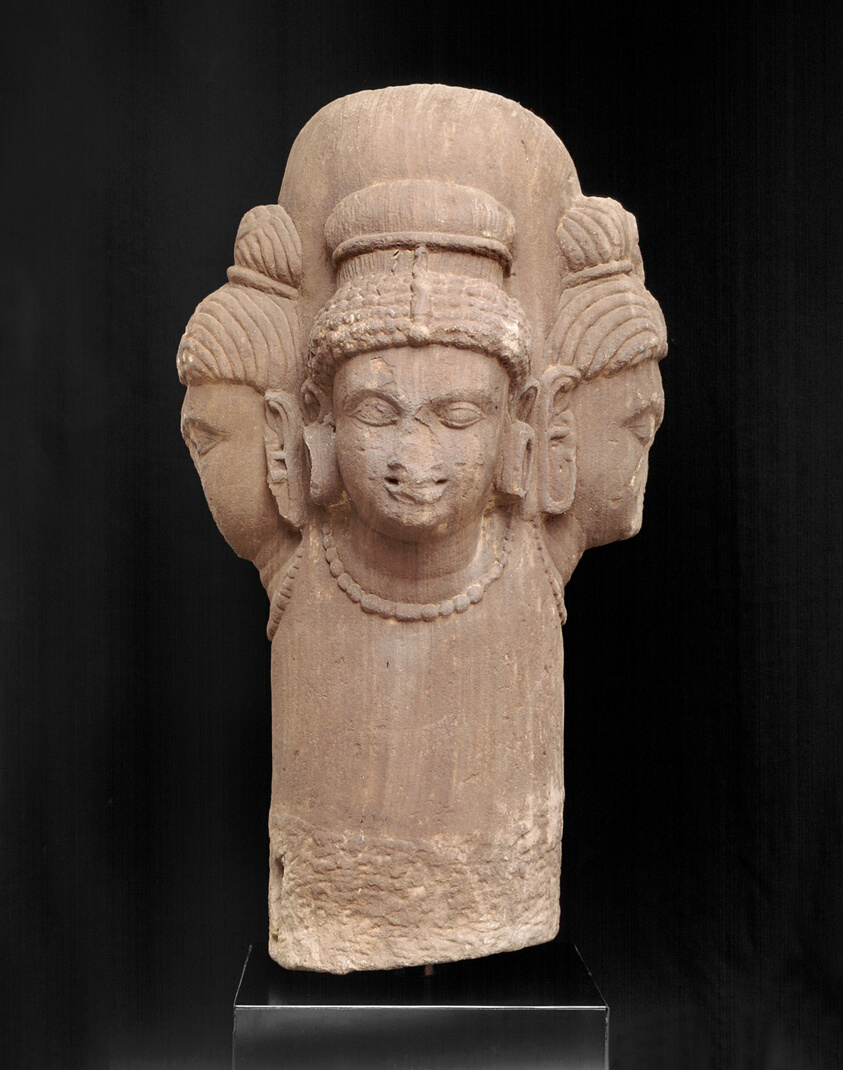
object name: Sculpture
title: Emblem of God Shiva with Four Faces (Chaturmukhalinga)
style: South Asian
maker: India; Rajasthan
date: 7th/8th century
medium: Sandstone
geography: Rajasthan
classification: sandstone; stone; sculpture; asian art